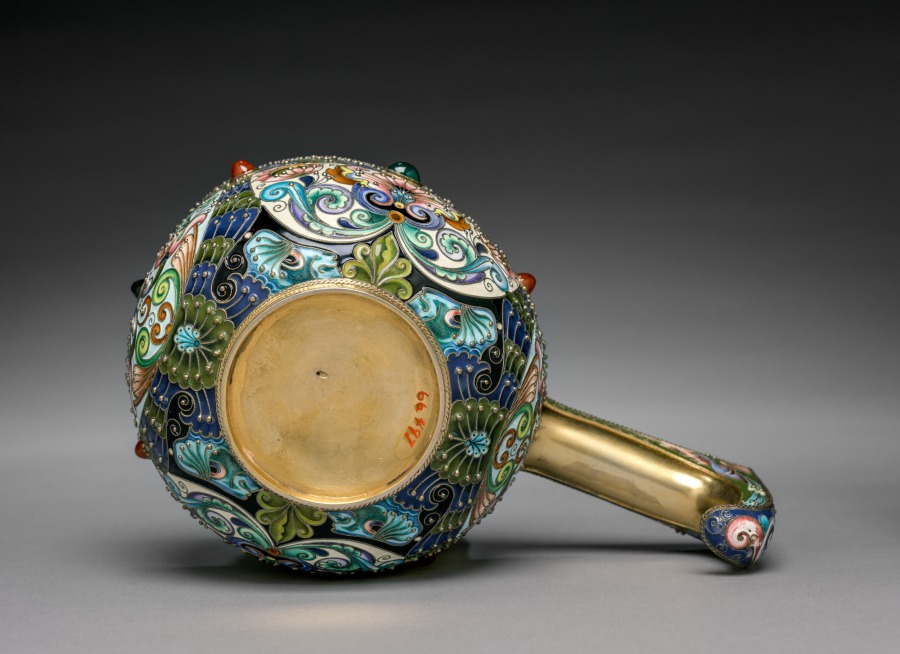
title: Kovsh (Wine Vessel)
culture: Russia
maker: House of Fabergé (Russian, 1842–1918)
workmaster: attributed to Feodor Ivanovich Rückert (Russian, 1840–1917)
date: 1896–1906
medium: silver gilt, enamel, cabochon gems, chrysoprases, carnelians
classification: Miscellaneous